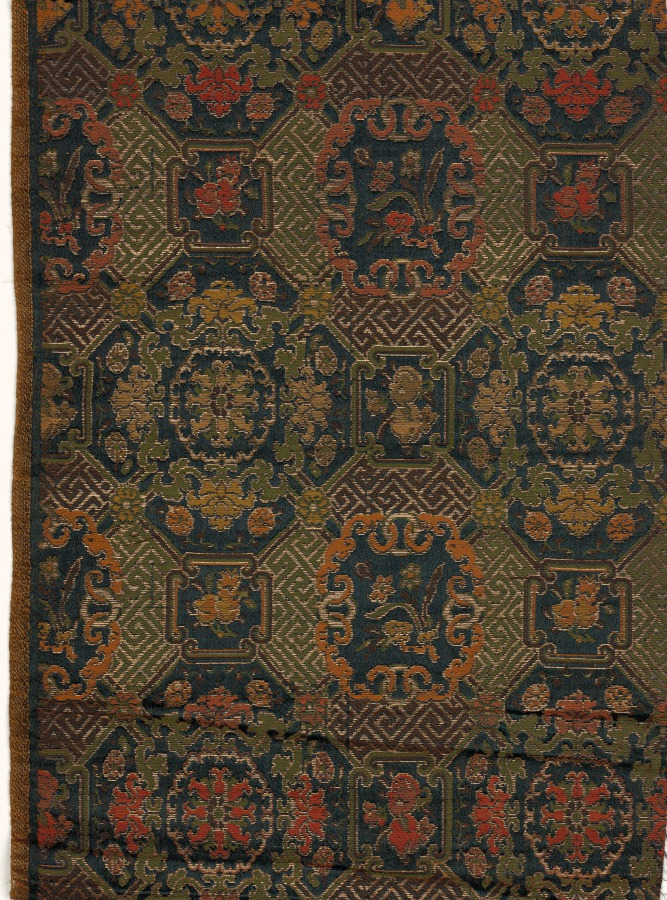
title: Fragment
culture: China, 19th century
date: 1800s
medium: silk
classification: Textile